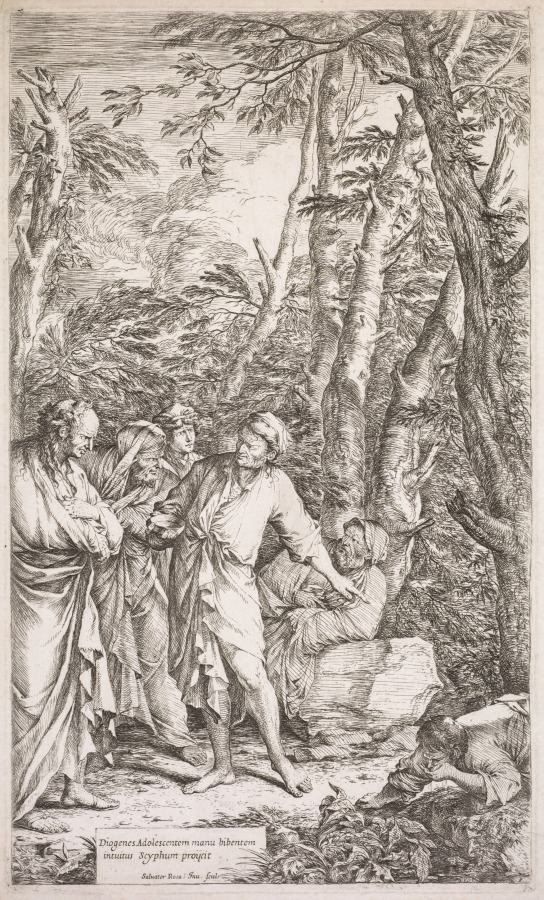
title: Diogenes and His Cup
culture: Italy, 17th century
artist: Salvator Rosa (Italian, 1615–1673)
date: 1662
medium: etching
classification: Print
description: Diogenes was an ancient Greek philosopher who valued poverty and shunned worldly goods, to the extent that he discarded his drinking bowl when he observed a youth drinking water from cupped hands, as depicted here. The print was made by the eccentric Neapolitan artist Salvator Rosa, who rejected conventional patronage in order to focus on themes that interested him. The placement of the narrative within a lush landscape is typical of Rosa’s approach, as is the emphasis on the unconventional principles of his subject, with which he identified.